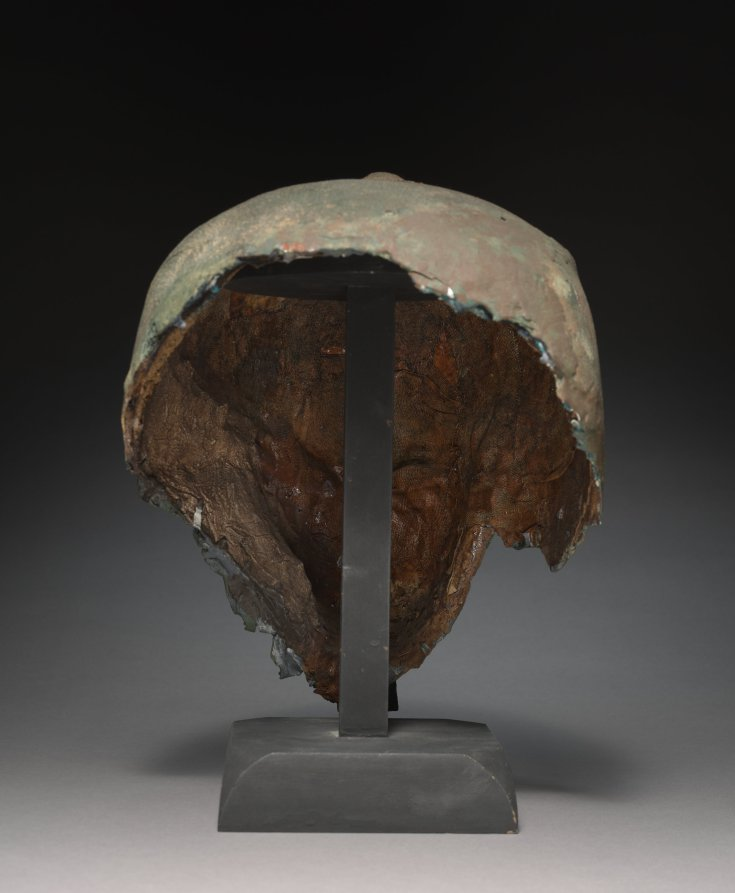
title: Mummy Mask of Senbi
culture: Egypt, Meir, Middle Kingdom (2040–1648 BCE), Dynasty 12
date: 1980–1801 BCE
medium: cartonage, wood, limestone, obsidian, paint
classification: Funerary Equipment